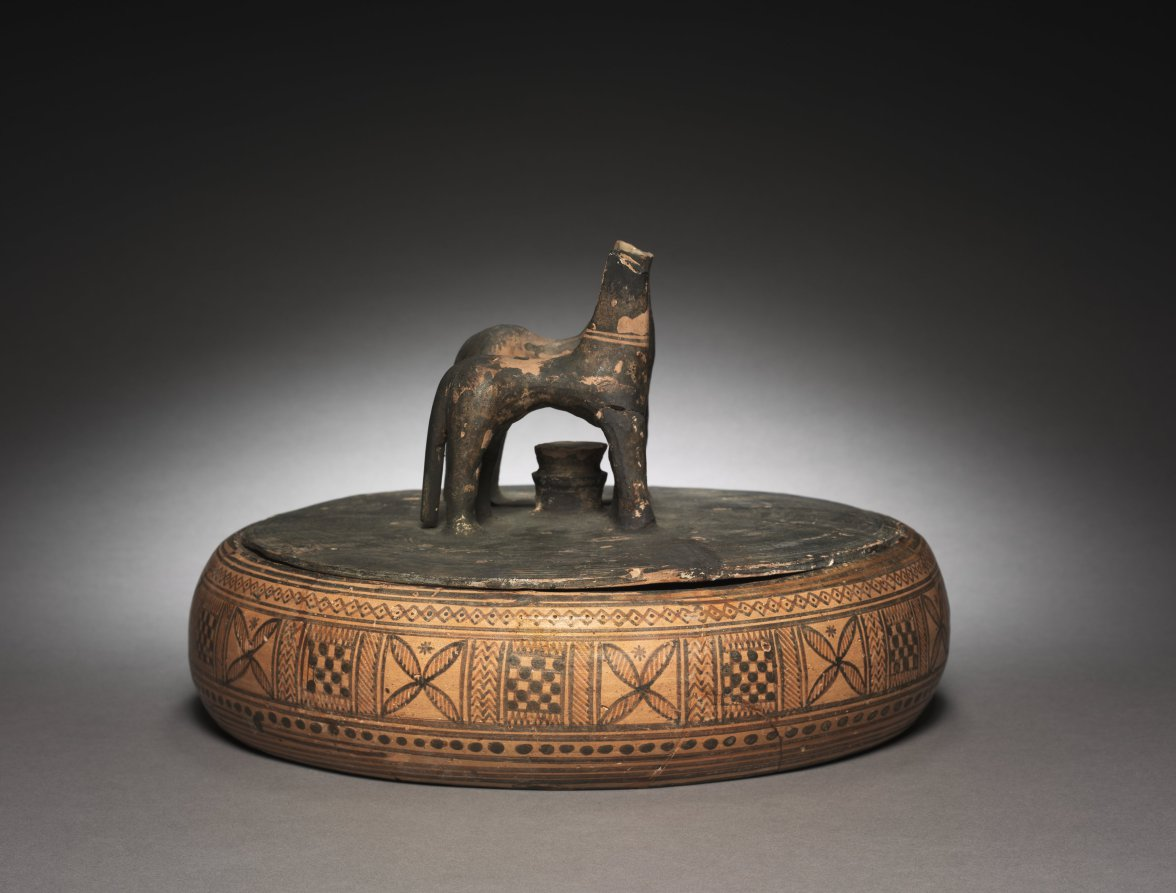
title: Geometric Horse Pyxis (Cylindrical Lidded Box)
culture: Greek, Attic, Late Geometric la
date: c. 760–750 BCE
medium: ceramic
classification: Ceramic